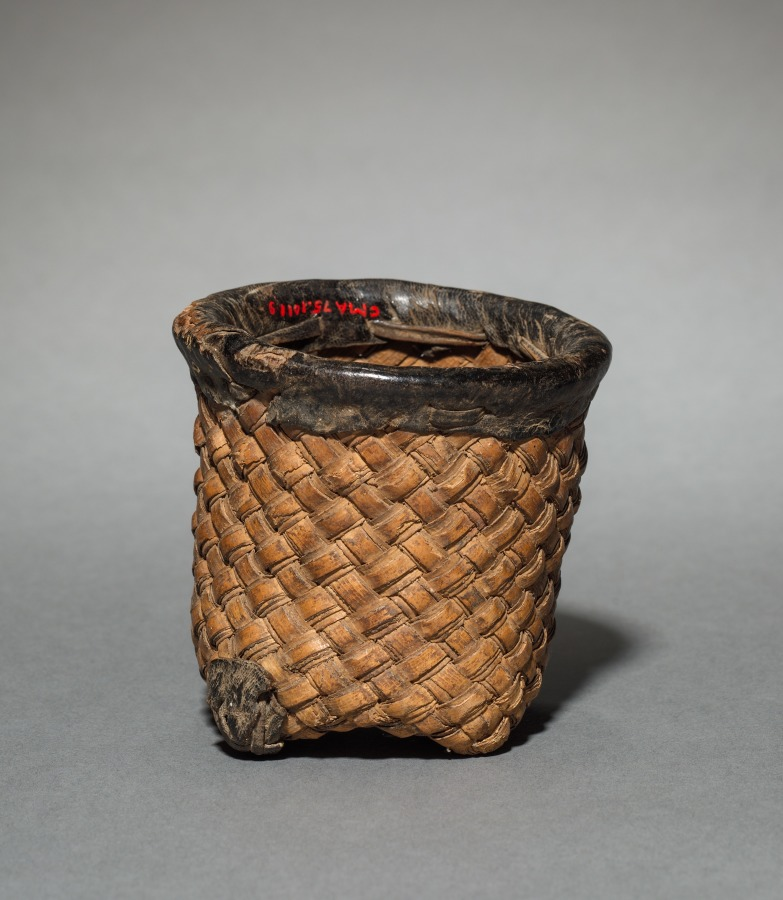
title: One of Ten Nesting Wedding Baskets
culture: Africa, Western Africa, Burkina Faso, Lobi–style maker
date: c 1900s?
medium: Plant fiber and leather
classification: Vessels